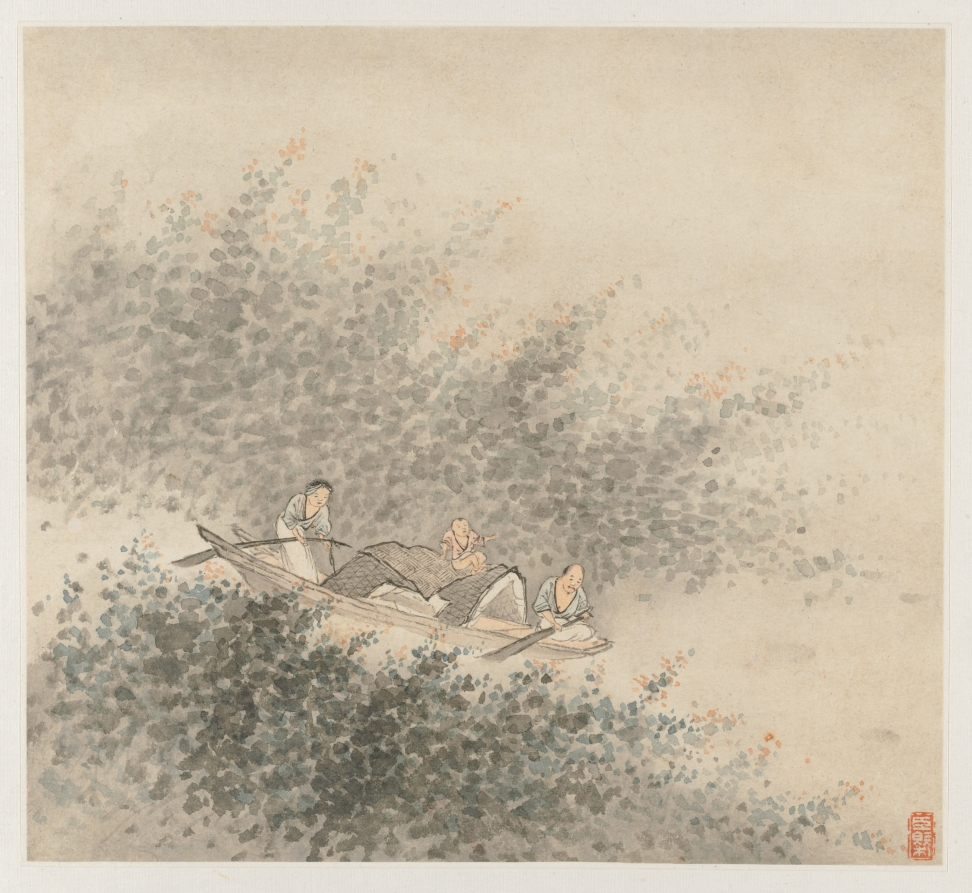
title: Album of Landscapes: Leaf 6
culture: China, Qing dynasty (1644-1911)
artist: Wang Gai (Chinese, active c. 1677–1705)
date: 1677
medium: album leaf, ink and light color on paper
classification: Painting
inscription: Poem by Tai Wang-lun